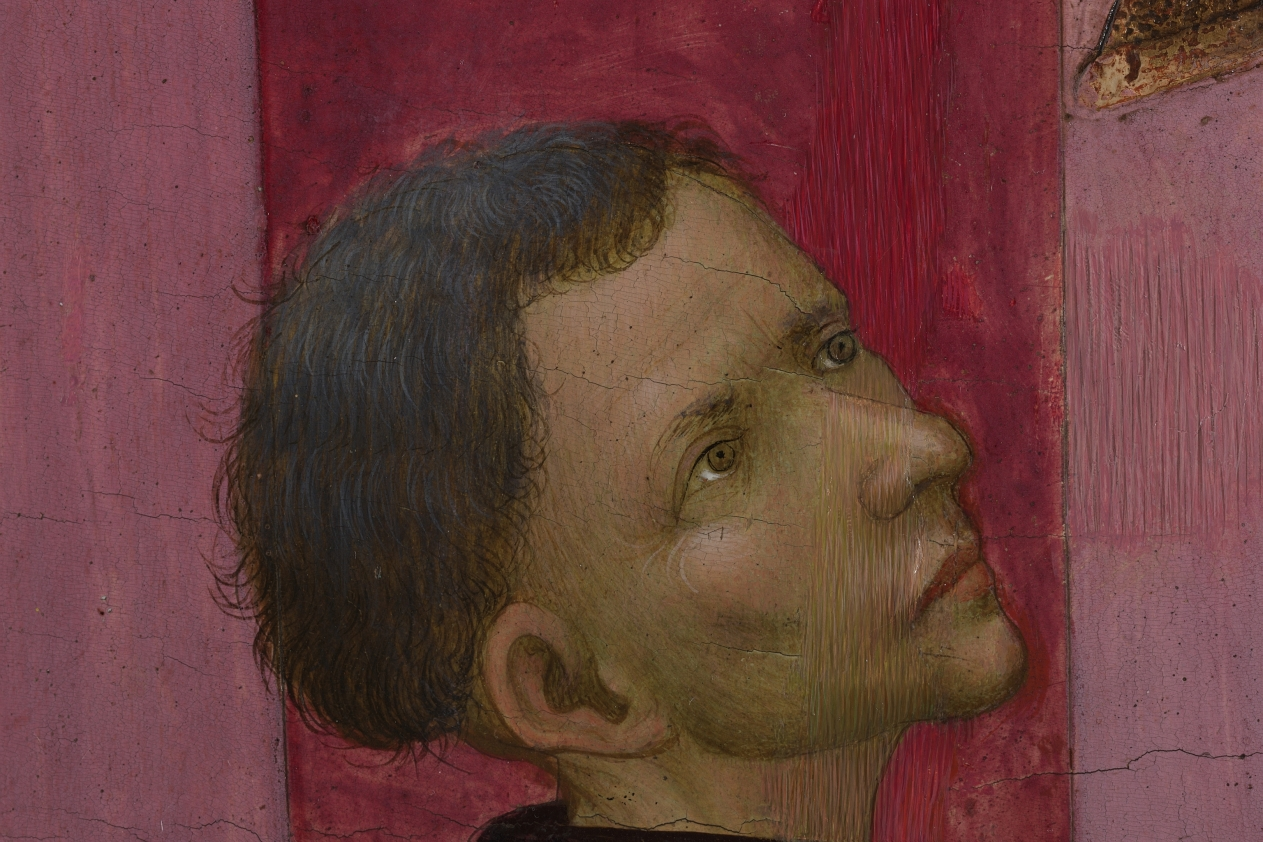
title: A Bishop Saint with a Donor (Saint Louis of Toulouse?)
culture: Spain, Catalonia, early 15th century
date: early 1400s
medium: tempera with raised and gilded gesso on wood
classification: Painting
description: The style of this painting suggests that it comes from Catalonia in northeastern Spain, though the identity of its artist remains unknown. The painting represents a youthful bishop-saint identifiable by a bishop’s symbols of authority, his miter and crozier. He wears rich vestments. Below, the figure in black represents the donor of the painting—likely a wealthy layperson rather than a cleric. The identity of the saintly bishop is speculated to be Saint Louis, Bishop of Toulouse, on the basis of his youth. Louis was consecrated Bishop of Toulouse in 1297, died six months later at the age of 23, and was canonized in 1317. His relics were moved in 1423 to Valencia and his cult flourished in Spain.